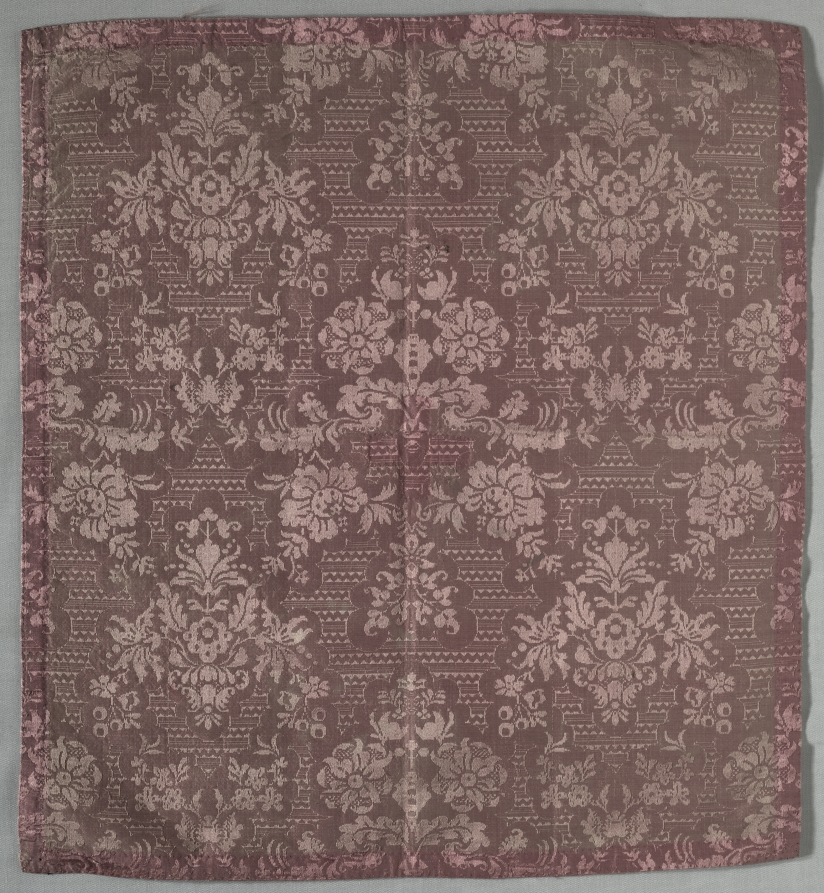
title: Ciborium Veil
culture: Italy, 18th century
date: 1700s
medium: silk damask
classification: Textile